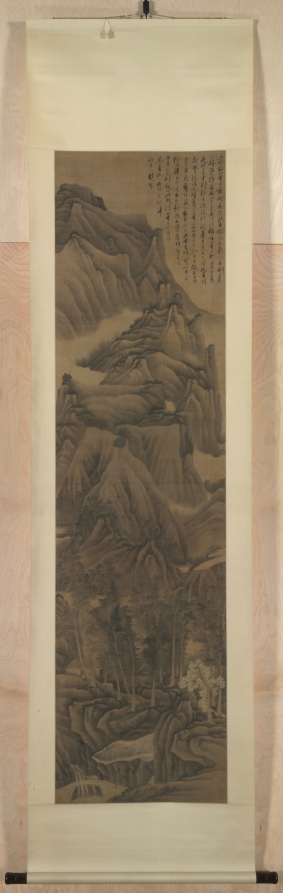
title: Landscape in the Style of Dong Yuan and Juran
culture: China, Qing dynasty (1644-1911)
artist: Gong Xian (Chinese, 1599–1689)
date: c. 1650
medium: hanging scroll, ink with white pigment on silk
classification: Painting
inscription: 畫家董巨，實開南宗。既無剛根之氣，復無刻畫之跡。後之作者或以才見，或以法稱。唯董巨則幾乎道矣。然逞才則離法，泥法則叛道。至道無可道。說者謂即歛才就法之謂道。問之董巨，而董巨不知，忽乎微矣。此幅余二十年前舊作。藏之新安吳氏。吳君晉明寶之若家珍。後携之金陵。命余題識。余因與晉明論畫及此，并紀之。非敢曰此效法董巨而有得焉者也。 庚戌冬杪半畝居人龔賢。 [印]龔半千; 野遺賢; [左下]龔賢; [上]可能另有龔賢一印。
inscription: 2 additional seals of Cheng Qi 程琦 (1911–1988)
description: Towering peaks and unfolding ranges are piled up and overlaid with layer after layer of brushwork to give an overall dense, dark, and even melancholic effect. Gong Xian created a personal style of landscape, which departed greatly from his models Dong Yuan and Juran. The tension between tradition and individuality had been a topic of interest for the Chinese artist. As Gong Xian writes in his inscription: "Painters of later periods may be known for their natural talents or praised for their observance of established traditions. . . . However, those who indulge in showing off their talent will deviate from the tradition, while those who adhere to tradition will alienate themselves from the Dao. The supreme Dao is inexplicable in words. . . ."